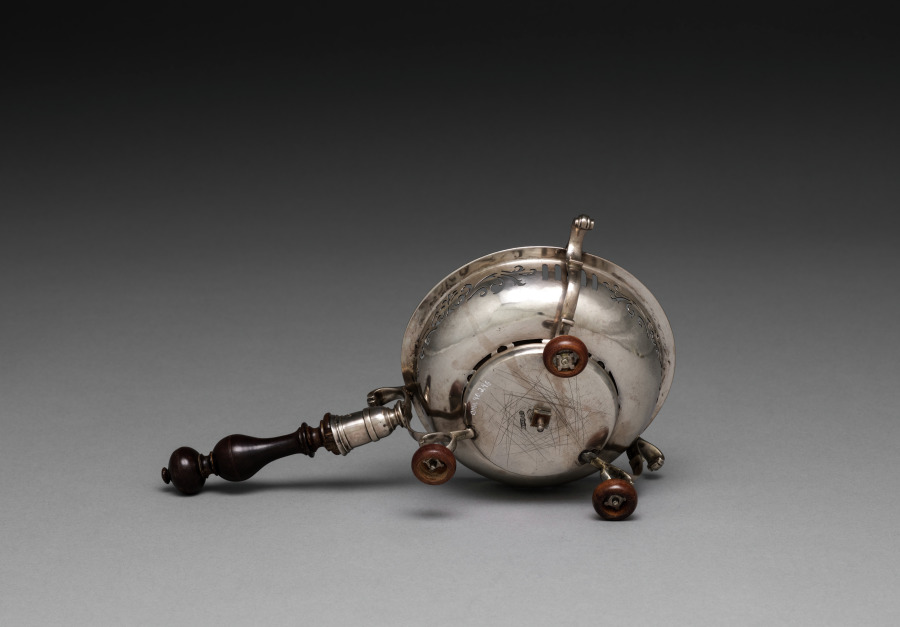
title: Chafing Dish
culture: America, Massachusetts and Connecticut, 18th century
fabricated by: John Potwine (American, 1698–1792)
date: c. 1730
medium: silver, wooden handle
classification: Silver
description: A small candle would have been placed under this dish for keeping the contents warm at the table.